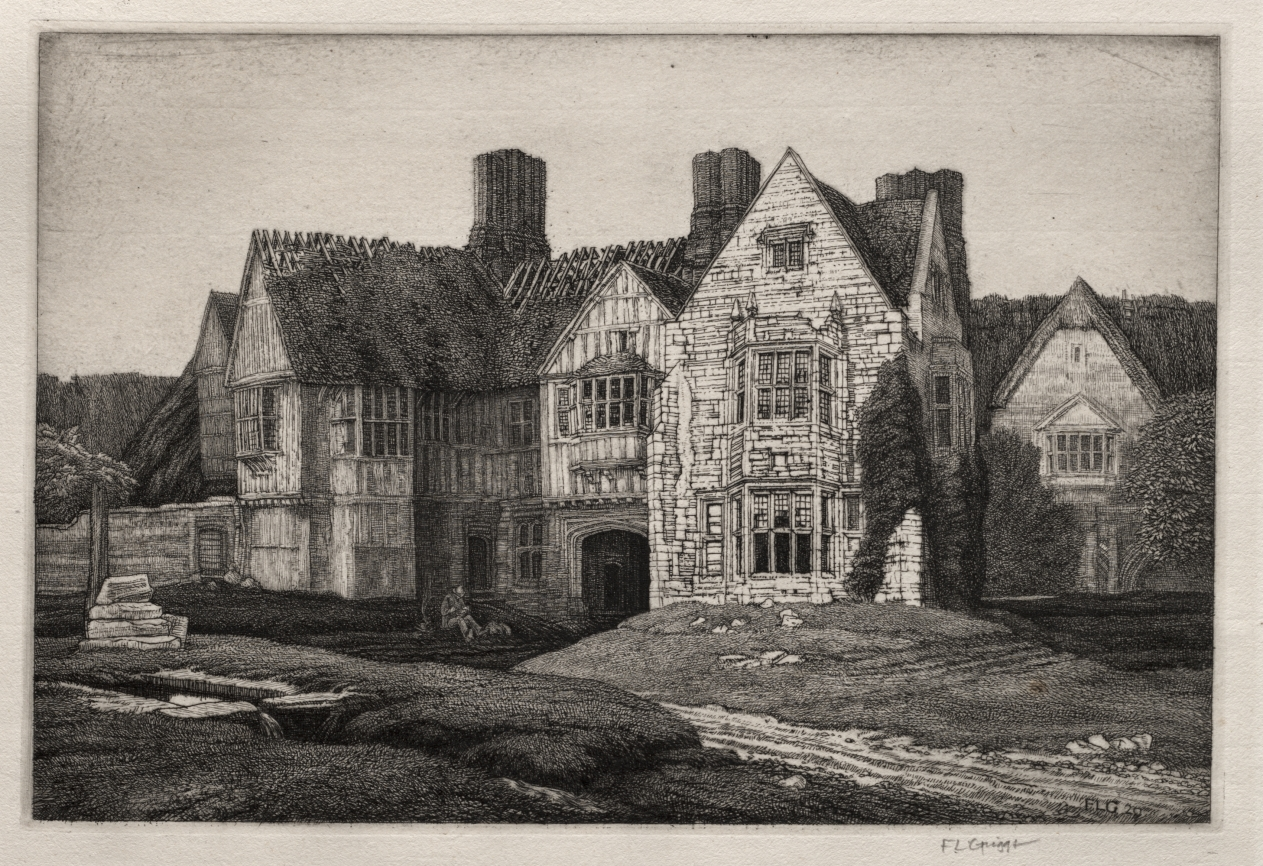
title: The Maypole Inn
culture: England, 20th century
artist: Frederick Landseer Maur Griggs (British, 1876–1938)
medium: etching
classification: Print